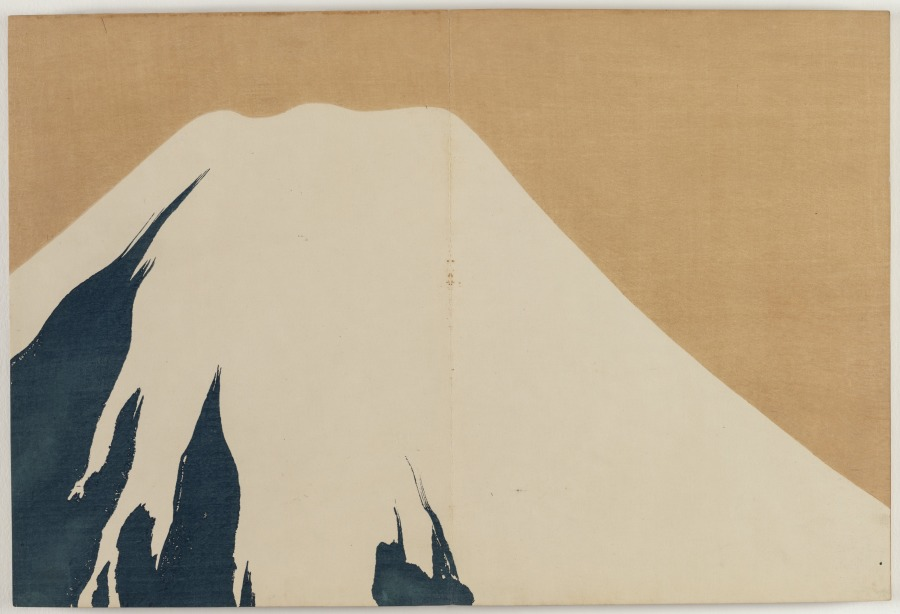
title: Flowers of a Hundred Worlds (Momoyogusa): Mount Fuji (Fuji)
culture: Japan, Meiji period (1868–1912)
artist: Kamisaka Sekka (Japanese, 1866–1942)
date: 1909–10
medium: color woodcuts with gold and silver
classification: Bound Volume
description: This print from a set of three woodblock printed albums displays the graphic design prowess of Kamisaka Sekka. The images were first distributed one by one to subscribers to the series but later were reissued in bound form, like this book, for mass consumers. Each print features a vignette taken from nature or Japanese literature. Many of the scenes have a long history in Japan, originating in the 900s or 1000s and having been interpreted by all manner of artists since that time. Sekka’s selections hew closely to precedents from the Rinpa style originated by painter Tawaraya Sōtatsu (c. 1570–c. 1640) and calligrapher Hon’ami Kōetsu (1558–1637).